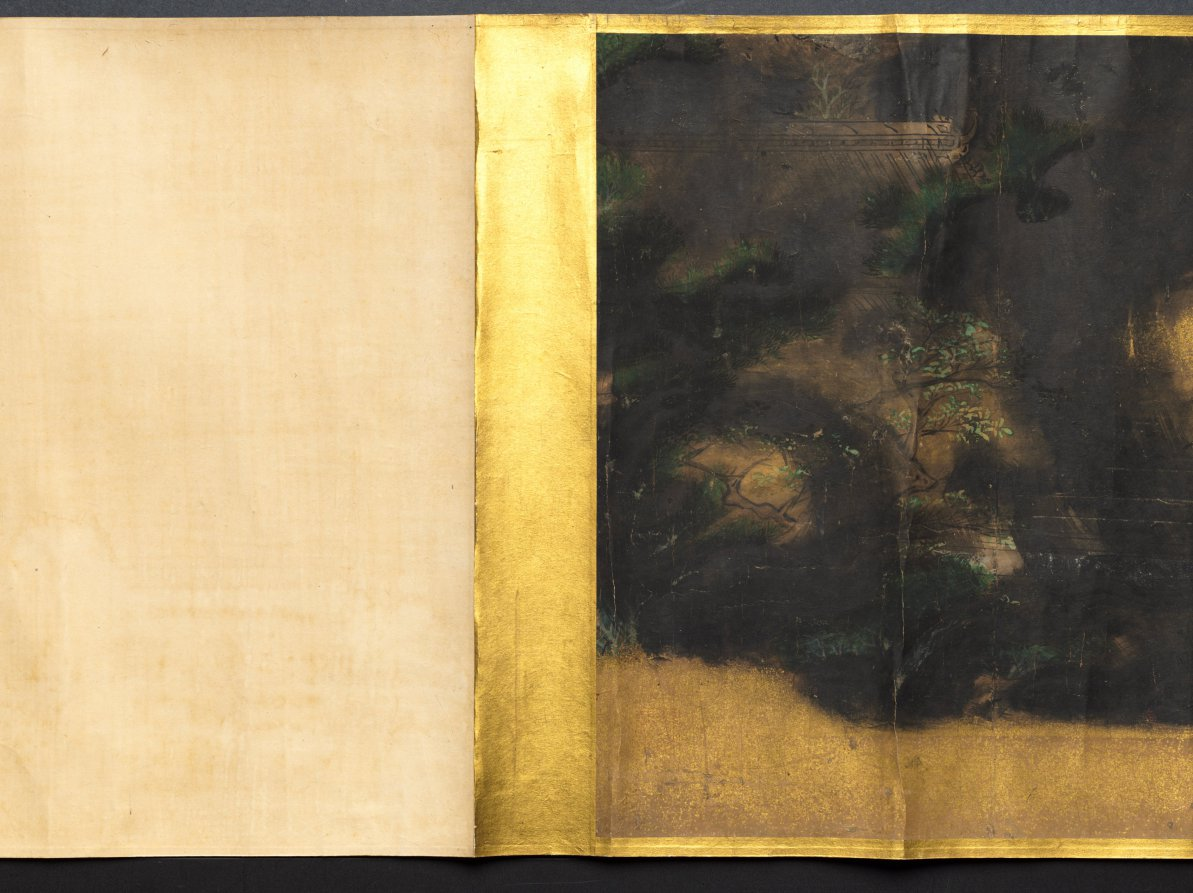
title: People Fleeing from a Fire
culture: Japan, Edo period (1615–1868)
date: 1615–1868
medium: Handscroll; color and gold on paper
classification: Painting